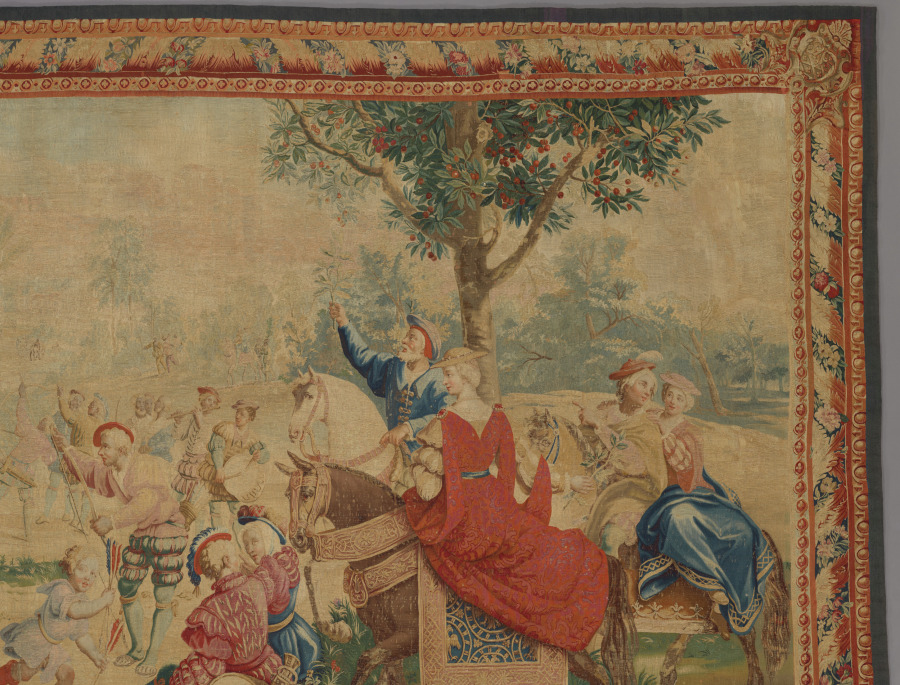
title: Month of May: Scene of May Day Festival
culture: France, 18th century, Period of Louis XV (1723-1774)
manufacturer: Gobelins Manufactory (France, Paris, est. 1662)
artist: Michel Audran (French, 1701–1771)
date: 1723–1774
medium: tapestry weave: linen warp, wool and silk wefts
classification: Tapestry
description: Seated spectators and splendidly clothed ladies and gentlemen on horseback watch May Day festivities in this tapestry. In the middle distance, archers prepare to shoot at a bush and bird placed atop a maypole, while more spectators congregate in the receding landscape. A border of rolled acanthus leaves and flower garlands frames the scene. This scene is one of twelve so-called Months of Lucas tapestries, each depicting activities that coincide with a month of the year. The original “Months of Lucas” was a sixteenth-century Flemish tapestry set that was owned by the French monarchy and mistakenly attributed to Lucas van Leyden during the 1600s. To this day, they continue to be known as the “Months of Lucas.” This original set was burned in 1797 so their gold and silver metal threads could be used to replenish the depleted French coffers. Beginning in the 1600s, the popular Months of Lucas were reproduced in several different versions under various masters at the Gobelins Manufactory in Paris, the famous royal production center for French tapestries since Louis XIV (1638–1715). The lower right hand corner of this tapestry bears the signature of Michel Audran (1701–1771), director of the Gobelins high-warp loom workshop from 1732–71, who produced this tapestry for a private patron in addition to the other royal commissions of the set.